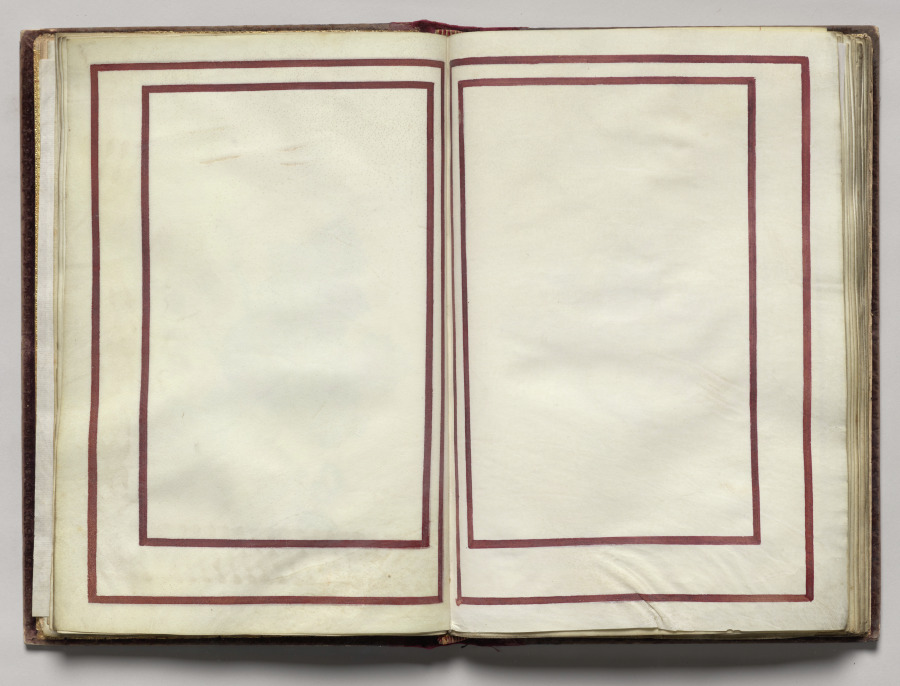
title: Border, folio 12 (recto), from Florilegium (A Book of Flower Studies)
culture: France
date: 1608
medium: watercolor, ink, silver and gold over occasional traces of pencil, on vellum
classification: Bound Volume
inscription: Dated: Poitiers 1608 (on frontispiece) Signed: On frontispiece in black ink, lower right: Van Kuyk Notation on drawing: Frontispiece: in pencil, lower margin: * élève de Van Kessel, peintre flammand (* in pencil also appears in front of Van Kuyk's name).